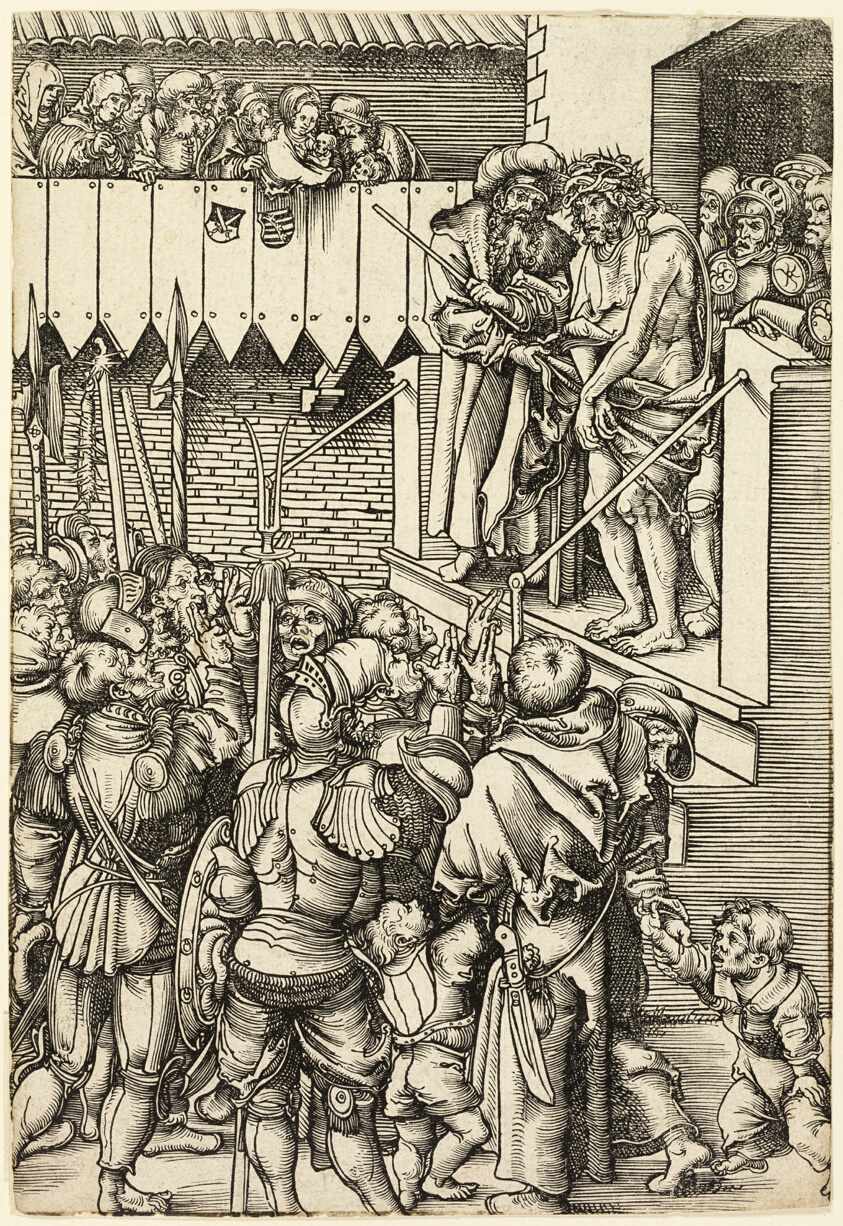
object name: Print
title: Ecce Homo, from The Passion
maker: Lucas Cranach the Elder (German, 1472-1553)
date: 1509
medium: Woodcut in black on cream laid paper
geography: Germany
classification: woodcut; print; prints and drawing